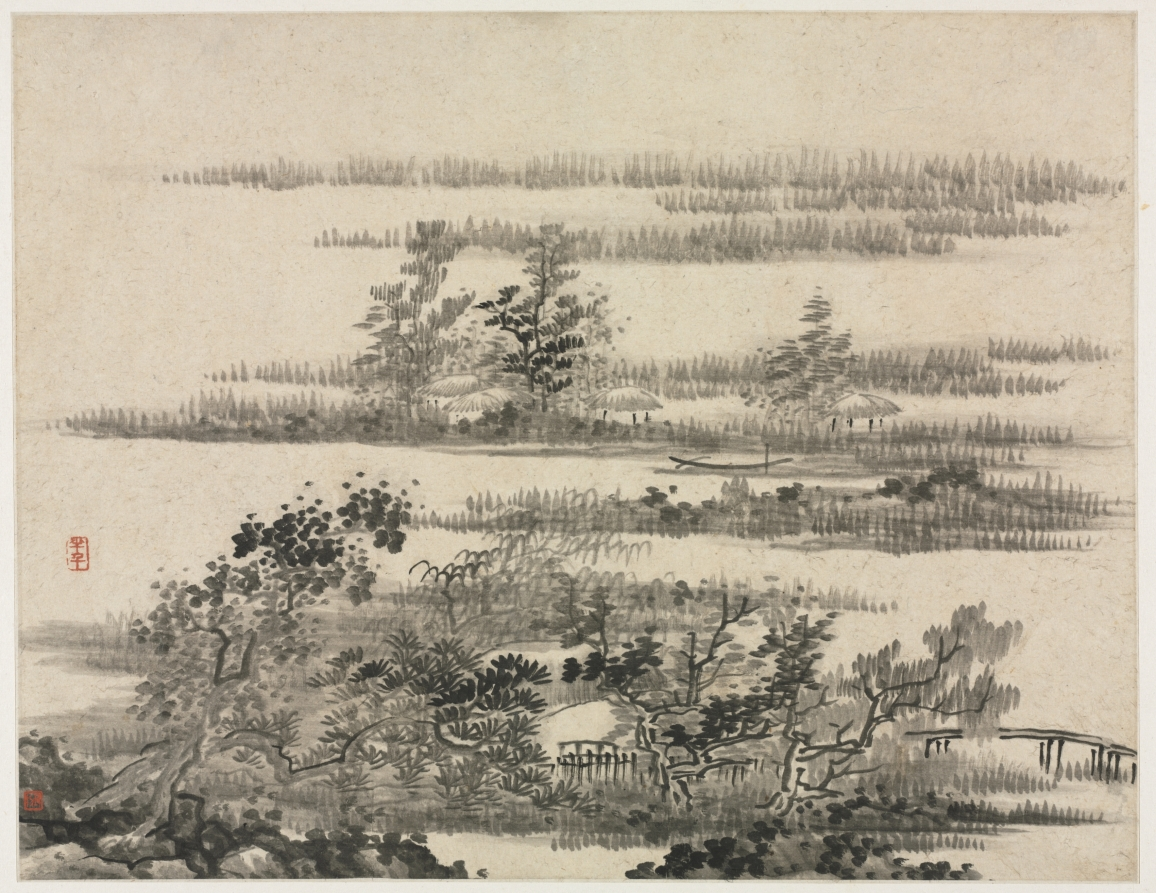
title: Summer in the Water Country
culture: China, Qing dynasty (1644-1911)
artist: Gong Xian (Chinese, 1599–1689)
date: 1670s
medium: Album leaf; ink on paper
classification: Painting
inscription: Artist's seal: Ban qian 半千. 1 additional seal unidentified.